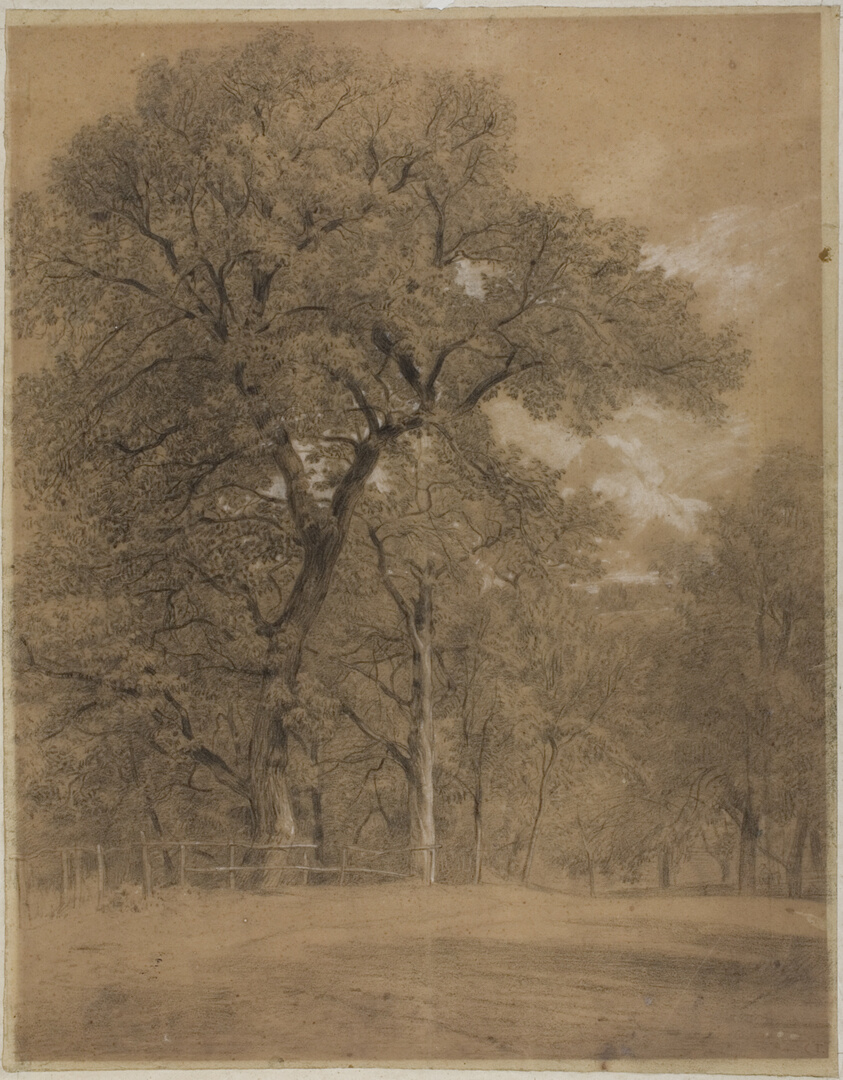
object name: Drawing and Watercolor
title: Edge of a Forest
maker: Constant Troyon (French, 1810-1865)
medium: Black crayon, heightened with white chalk, on tan wove paper (discolored to brown), laid down on cream wove paper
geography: France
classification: crayon; drawings (visual works); prints and drawing